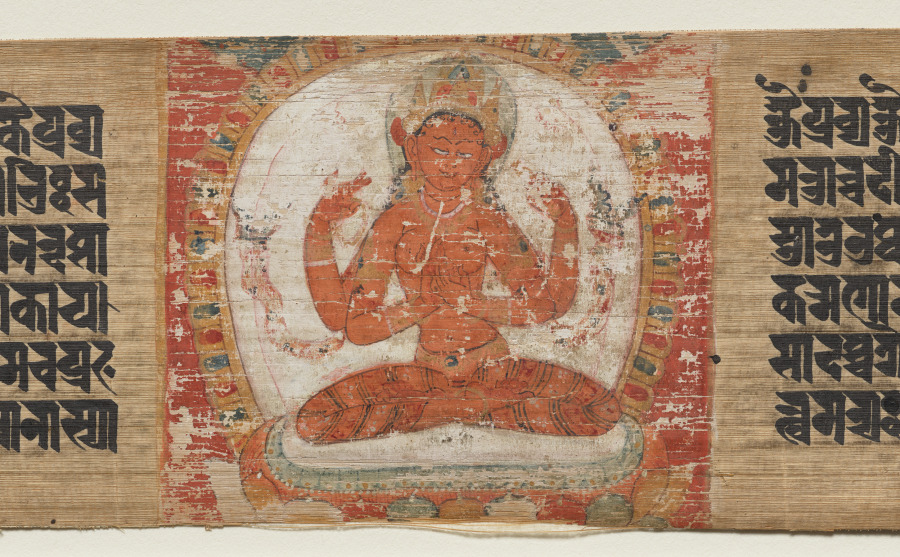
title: Prajnaparamita flanked by two bodhisattvas, folio 187 (recto), from a Manuscript of the Perfection of Wisdom in Eight Thousand Lines (Ashtasahasrika Prajnaparamita-sutra)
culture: Eastern India, Bihar, Vikramashila Monastery. Painting: Nepal, Kathmandu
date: Sunday, September 14, 1119 (year 239 of the Newar Samvat in the month of Ashvina)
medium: Gum tempera and ink on palm leaf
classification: Painting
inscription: [pravartayita]vyā deśayitavyopadeṣṭavyoddeṣṭavyā svādhyātavyā likhitavyā / tathāgatādhiṣṭhānena mahāpustake pravyaktapravyaktairakṣaraiḥ sulikhitāṃ kṛtvā satkartavyā gurukartavyā mānayitavyā pūjayitavyā arcayitavyā apacāyitavyā puṣpairdhūpairgandhairmālyairvilepanaiścūrṇaiścīvarairvādyairvastraiśchatrairdhvajairghaṇṭābhiḥ patākābhiḥ, samantācca dīpamālābhiḥ, bahuvidhābhiś ca pūjābhiḥ / iyamasmākamantikādānanda anuśāsanī / tatkasya hetoḥ? atra hi prajñāpāramitāyāṃ sarvajñajñānapariniṣpattirbhaviṣyati / tatkiṃ manyase ānanda śāstā te tathāgataḥ? ānanda āha - śāstā me bhagavan, śāstā me sugata / evamukte bhagavānāyuṣmantamānandametadavocat - śāstā te ānanda tathāgataḥ / paricarito 'smyānanda tvayā maitreṇa kāyakarmaṇā manaāpena, maitreṇa vākkarmaṇā manaāpena, maitreṇa manaḥkarmaṇā manaāpena / tasmāttarhi ānanda yathaiva tvayā mamaitarhi tiṣṭhato dhriyamāṇasya yāpayato 'smin samucchraye prema ca prasādaś ca gauravaṃ ca kṛtam, tathaiva tvayā ānanda mamātyayādasyāṃ prajñāpāramitāyāṃ kartavyam / dvir api trir api te ānanda parīndāmi anuparīndāmi enāṃ prajñāpāramitām, yatheyaṃ nāntardhīyeta, yathā nāsyāṃ tvamanyaḥ puruṣaḥ syāḥ / yāvadānanda iyaṃ prajñāpāramitā loke pracariṣyati, tāvattathāgatastiṣṭha[tīti]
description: In the center of the page is a seated goddess of wisdom, named Prajnaparamita, who personifies the content of the text itself. A red and white bodhisattva also attend her on either side. This manuscript, consisting of 188 double-sided folios, was calligraphed by a scribe at a monastery in northeastern India, commissioned by a monk from Nepal. Judging from the style of the paintings, they are the work of Nepalese artists.